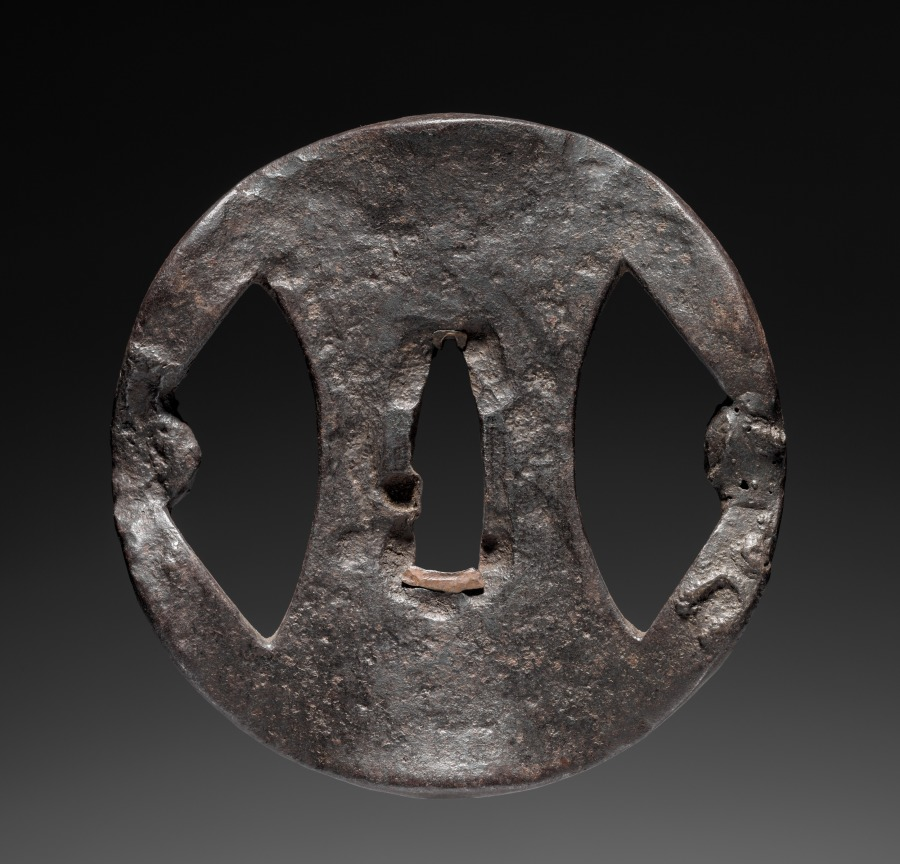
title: Sword Guard (Tsuba) with Fans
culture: Japan, possibly Edo period (1615-1868)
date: c. 1615–1868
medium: iron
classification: Arms and Armor